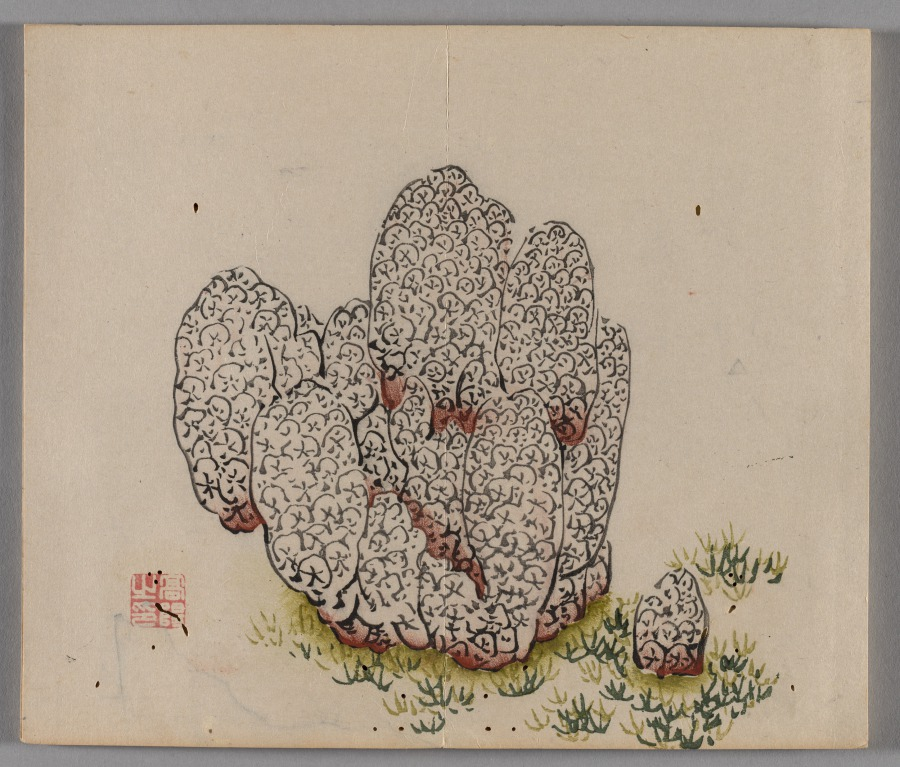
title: Ten Bamboo Studio Painting and Calligraphy Handbook (Shizhuzhai shuhua pu): Rocks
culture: China, Qing dynasty (1644-1911)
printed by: Hu Zhengyan (Chinese, c. 1584–1674)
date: 1633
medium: Woodblock-printed book; ink and colors on paper; first edition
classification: Print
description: Color printing reached a level of perfection in the early 1600s, as seen in this Ten Bamboo Studio Collection of Calligraphy and Painting and the Mustard Seed Garden Manual of Painting (printed 1679 and 1701). The painterly quality, precision in registering (aligning) the woodblocks, and harmonious colors made them the most successful color print editions in Chinese history. Both editions were printed and compiled in Nanjing, spread nationwide, and had a great impact on the arts in Japan and Korea.